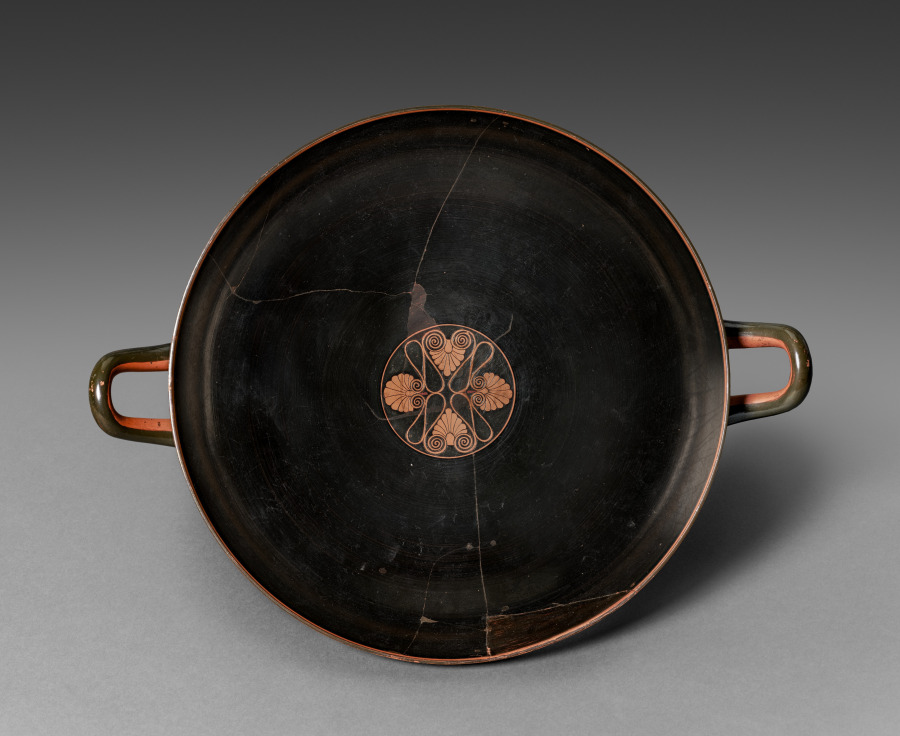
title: Red-Figure Eye Cup: Warriors (A), Musician and Youths (B)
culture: Greek, Attic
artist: attributed to Psiax (Greek, Attic, active c. 525–505 BCE)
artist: and Group of Leipzig T 3599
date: c. 520 BCE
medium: ceramic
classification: Ceramic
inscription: Graffito on underside of foot: Ζωιιλος [ZOILOS, perhaps the name of an owner]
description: Red-figure eye cups, like their more common black-figure brethren (including one in Cleveland), feature two large eyes on either side, producing a masking effect for drinkers. Typically, palmettes flank the eyes, with either a nose or figure at center. Here, the innovative painter Psiax, who worked in both black-figure and red-figure, moved the palmettes to the tondo and created three-figure compositions on each exterior side: two warriors converging on a fallen comrade (or enemy); and a youth playing a cithara for an audience of two. The experimental nature of early red-figure may explain the unusual spear and awkwardly twisted torso and lower leg of the central warrior.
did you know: The fallen warrior’s spear is done with added clay (shaft) and incision (head), not red-figure.